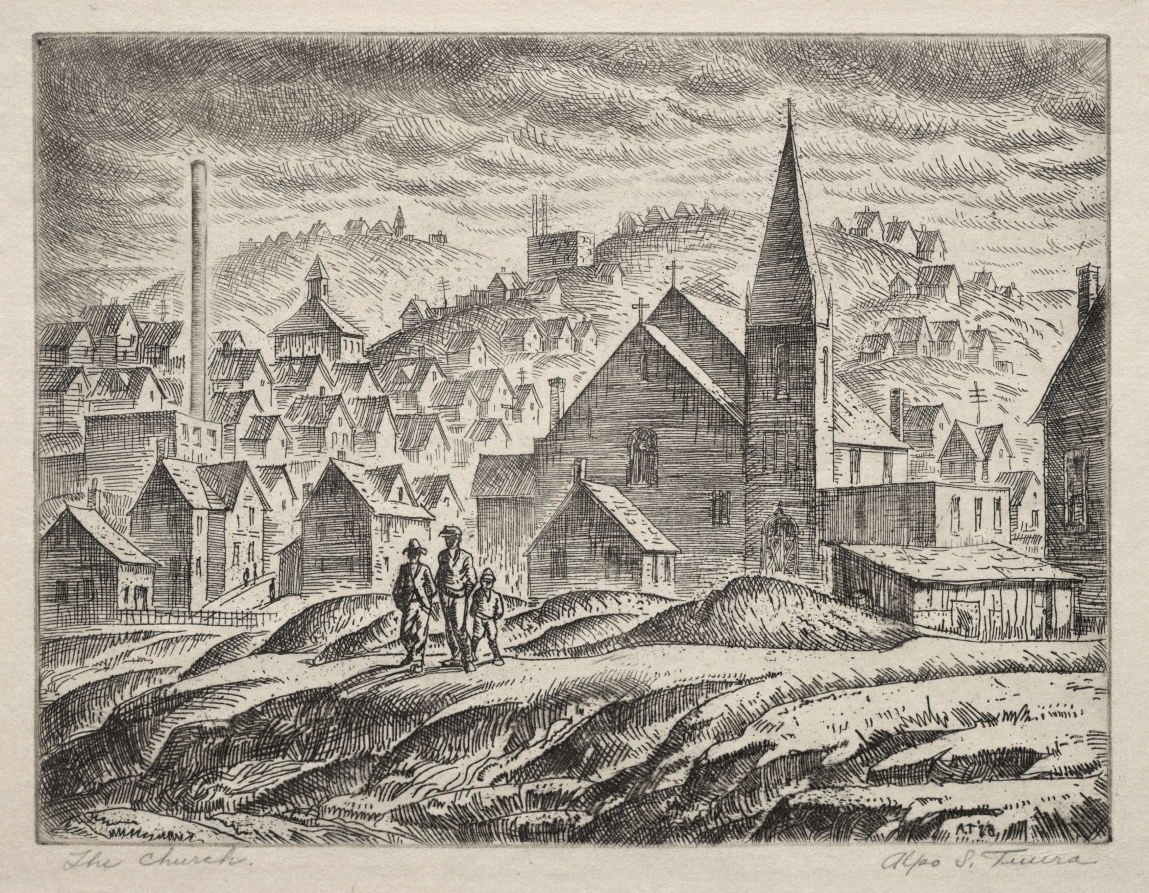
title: The Church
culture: America, Ohio, Cleveland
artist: Alpo S. Tuura (American, 1902–1928)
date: 1928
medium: etching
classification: Print